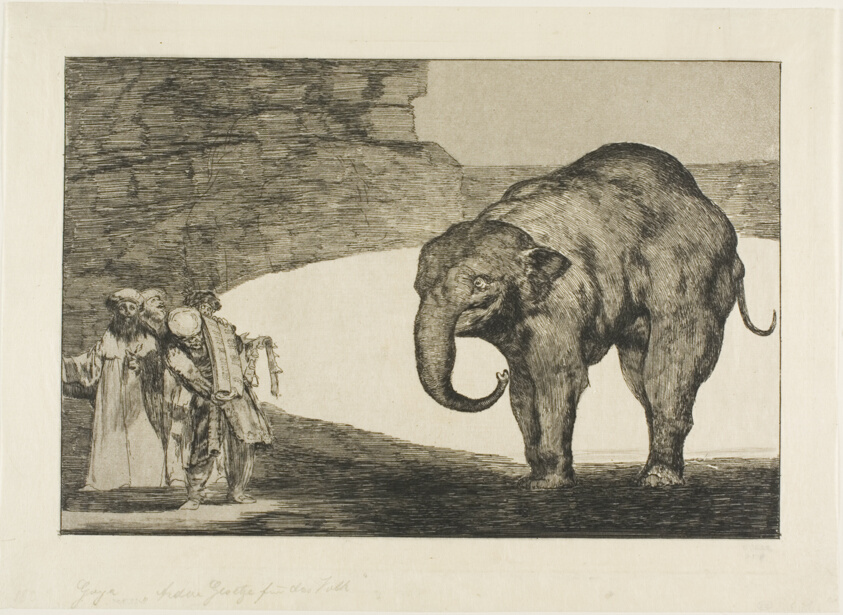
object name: Print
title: Animal Folly, from Disparates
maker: Francisco José de Goya y Lucientes (Spanish, 1746-1828)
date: 1816–17, published 1877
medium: Etching and burnished aquatint in black on Japanese paper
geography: Spain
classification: etching; print; prints and drawing